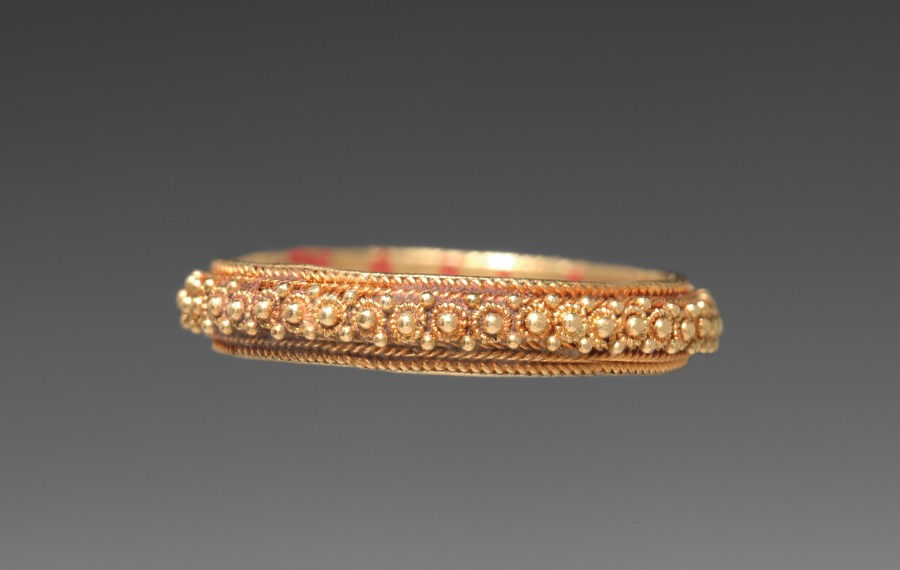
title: Ring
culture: Cambodia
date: 1900s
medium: gold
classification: Jewelry